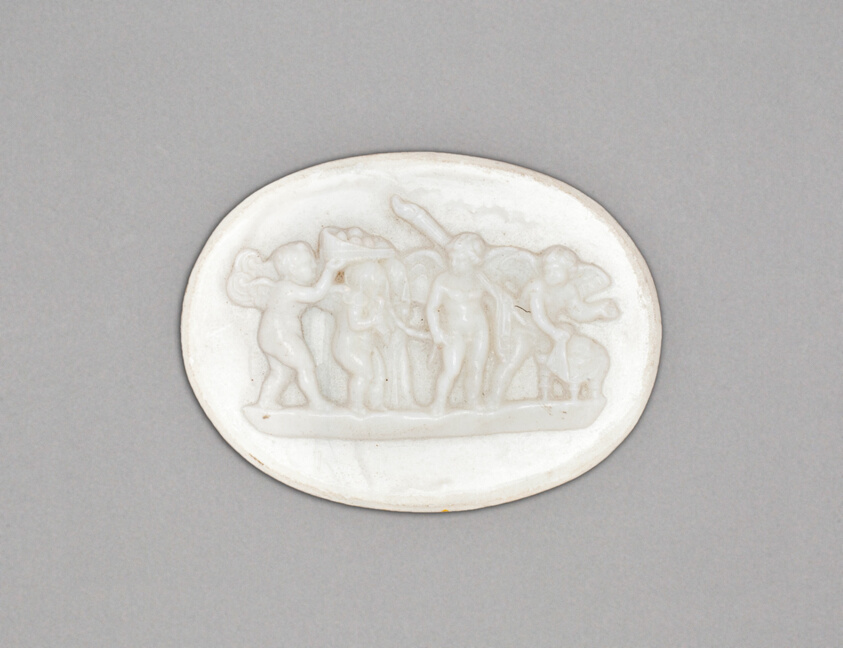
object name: Ceramics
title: Medallion with Marriage of Cupid and Psyche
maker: Wedgwood Manufactory (England, founded 1759)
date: Late 18th century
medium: Stoneware (jasperware)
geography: Burslem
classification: glass; european decorative arts; ceramics